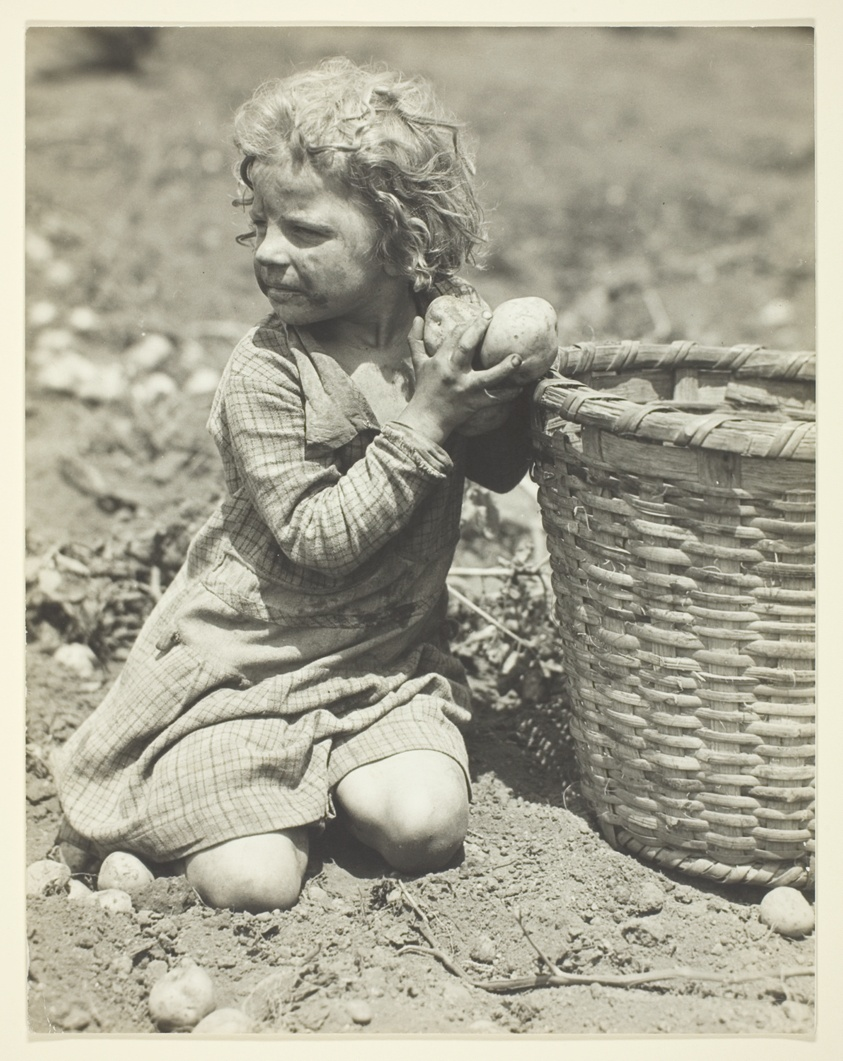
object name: Photograph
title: Child Labor on the Farm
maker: Lewis Wickes Hine (American, 1874–1940)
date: 1930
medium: Gelatin silver print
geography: United States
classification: gelatin silver (developing-out-paper) pr; photographic process; photography; photograph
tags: Collected by Hugh Edwards, documentary